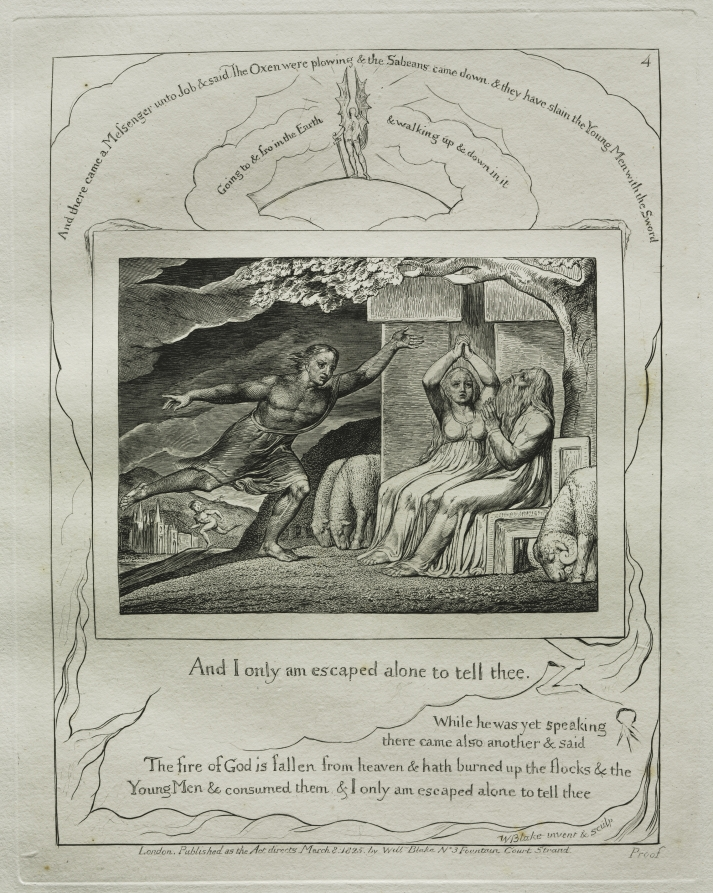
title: The Book of Job: Pl. 4, And I only am escaped alone to tell thee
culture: England, 18th century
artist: William Blake (British, 1757–1827)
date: 1825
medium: engraving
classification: Portfolio